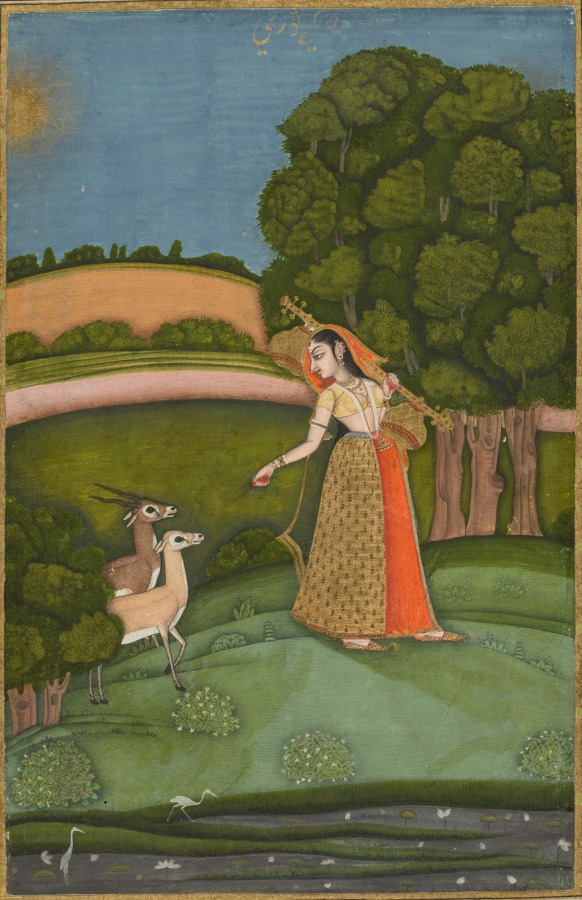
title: Todi Ragini, from a Ragamala Series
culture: Eastern India, Bengal, Murshidabad, 18th century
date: c. 1755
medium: Gum tempera and gold on paper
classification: Painting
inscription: identified at top in gold: ragini todi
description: Ragamala paintings were recognized as being associated with a season and time of day. Evoking a late morning in spring, here a young woman beguiles deer from the woodlands with her music to prevent them from destroying the crops in the field. The saturated hues and romantic idealization of the scene continue idioms begun in the Mughal court that were disseminated to regional centers of patronage such as Murshidabad. The inscription at the top of this page identifies the name, ragini todi, in Arabic script, which suggests that this ragamala series was made for a Muslim patron.